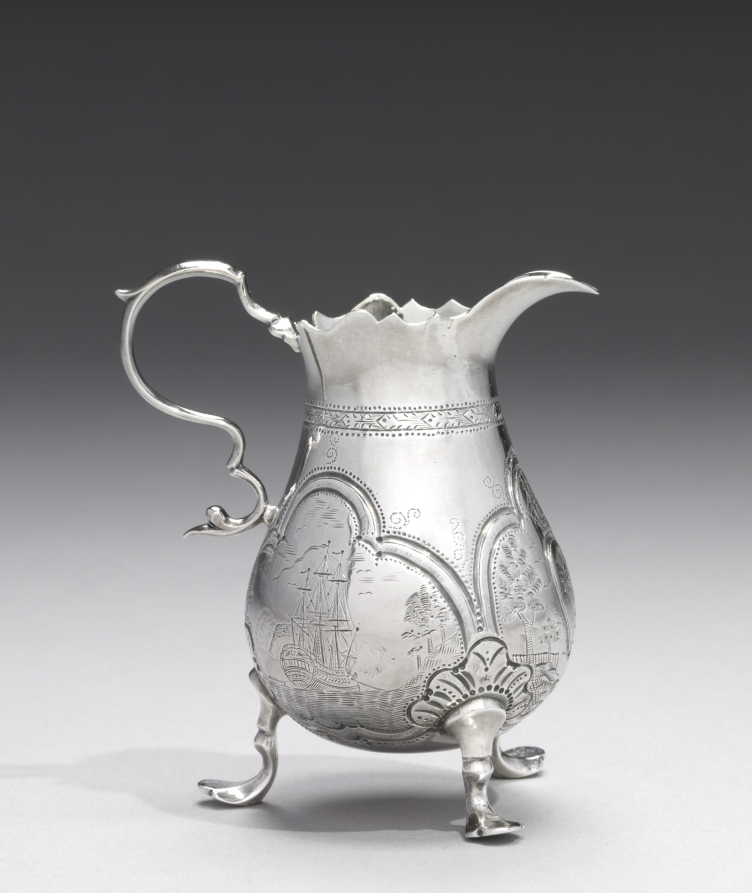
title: Cream Jug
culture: America, Massachusetts, Boston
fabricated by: Jacob Hurd (American, 1702–1758)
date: 1740–50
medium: silver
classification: Silver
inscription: engraved: coat of arms on front of body, underneath spout, and ECP (later) in script on bottom.